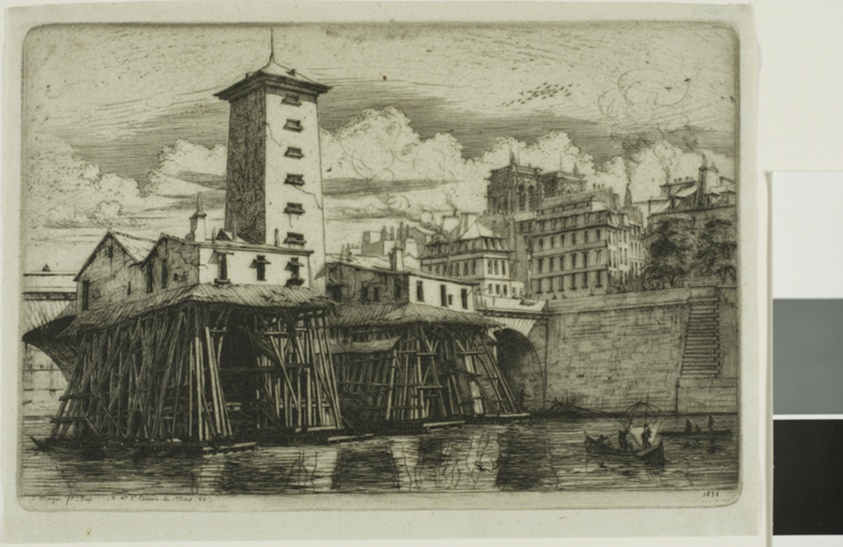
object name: Print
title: La Pompe Notre-Dame, Paris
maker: Charles Meryon (French, 1821-1868)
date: 1852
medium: Etching with drypoint on verdâtre (greenish) laid chine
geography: France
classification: etching; print; prints and drawing